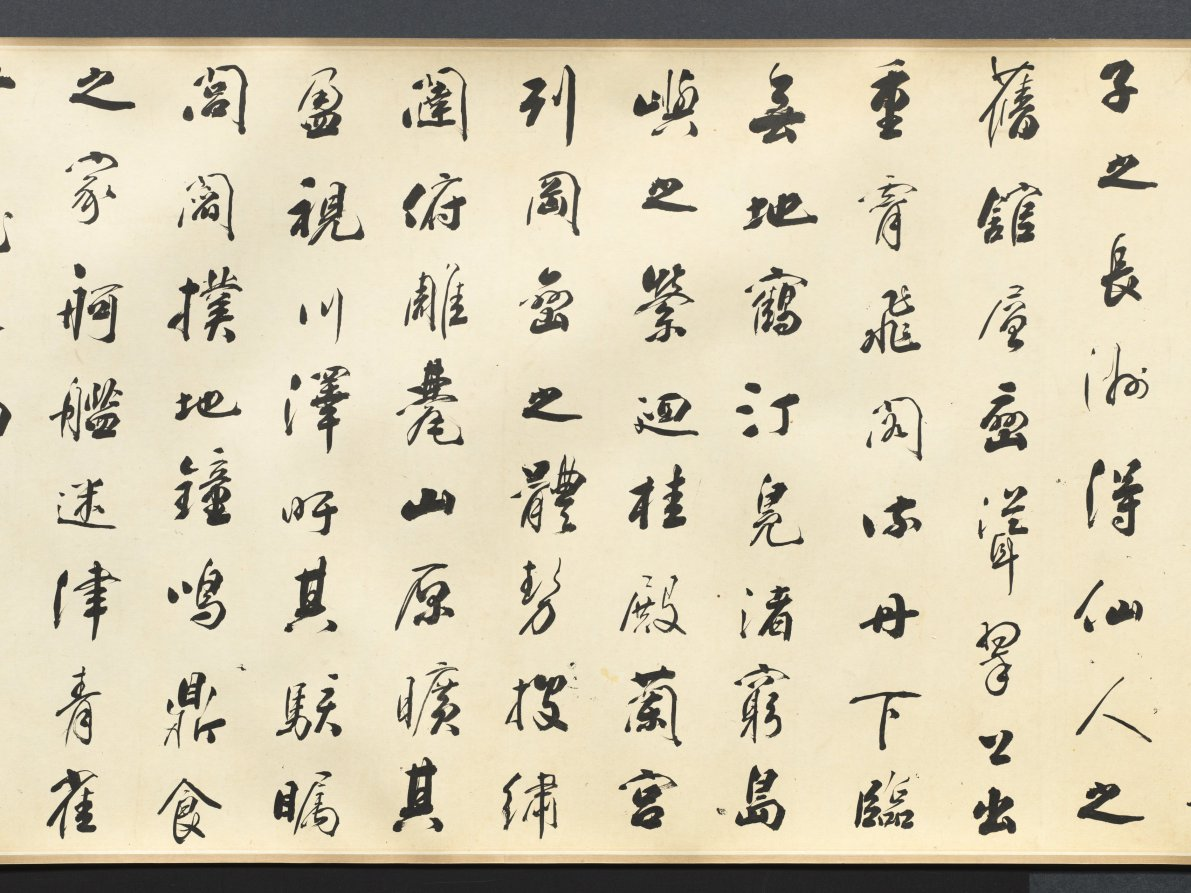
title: Calligraphy in Running Style based on Wang Bo's Essay on Tengwang Pavilion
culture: China, Changbai, Qing dynasty (1644-1911)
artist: Tiebao (Chinese, 1752–1824)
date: 1811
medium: handscroll, ink on paper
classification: Calligraphy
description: A member of the Donggo clan, Tiebao belonged to the Manchu Plain Yellow Banner army. As an official in the Qing court, he endured considerable vicissitude and his career was never smooth. Celebrated as a man of letters, he oversaw the publications of the Manchu military system as well as an anthology of poems by members of the imperial family and other Manchu dignitaries. In calligraphy, he was regarded as the equal of such eighteenth-century luminaries as Liu Yong (1720-1805) and Weng Fanggang (1733-1818). This handscroll is a work of his mature years and is exemplary of his disciplined and highly subtle approach to the art of calligraphy.